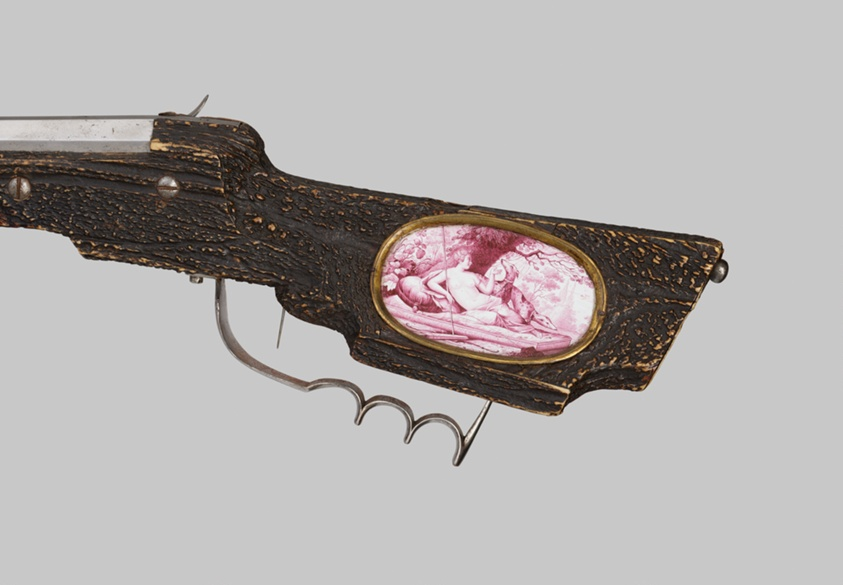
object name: Arms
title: Wheellock Rifle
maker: Elias Becker (German, Augsburg active 1633-1673); Augsburg, Germany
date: c. 1670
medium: Steel, staghorn, cherry wood, beech wood, gilt brass, copper, and enamel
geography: Augsburg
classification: firearm-long gun; arms; decorative arts; european decorative arts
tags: arms